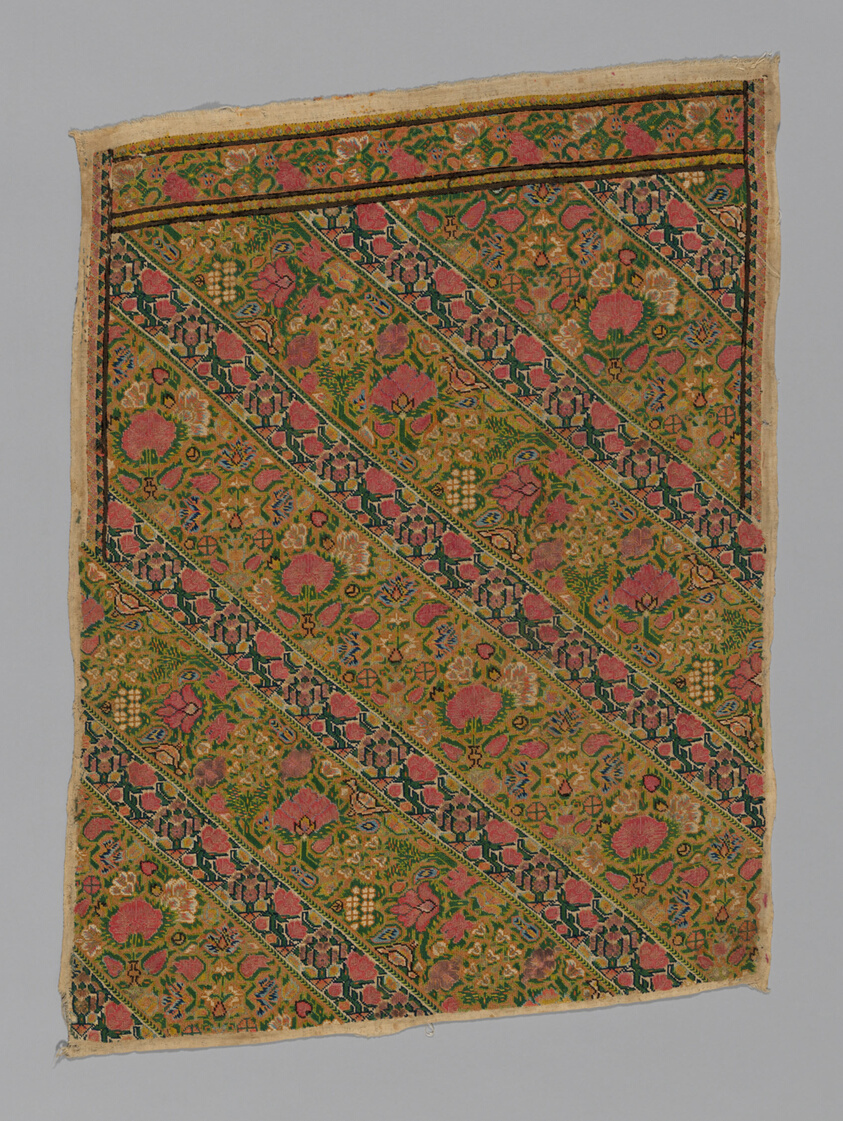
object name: Textile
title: Panel (From Trousers)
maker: Iran (Persia)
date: 19th century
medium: needlework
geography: Iran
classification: textile; needlework (visual works)